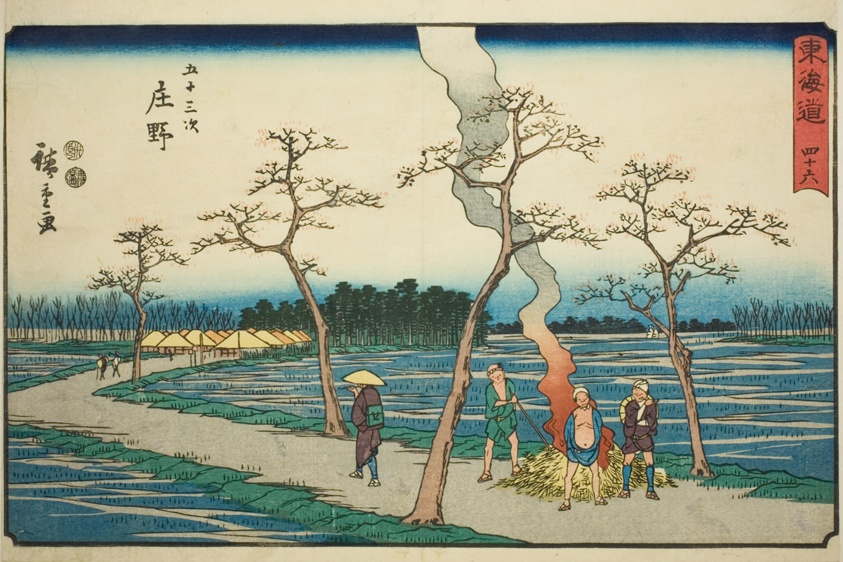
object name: Print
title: Shono—No. 46, from the series "Fifty-three Stations of the Tokaido (Tokaido gojusan tsugi)," also known as the Reisho Tokaido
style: Japanese (culture or style)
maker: Utagawa Hiroshige 歌川 広重; Japanese, 1797-1858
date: c. 1847/52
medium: Color woodblock print; oban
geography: Japan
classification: woodblock print; print; asian art